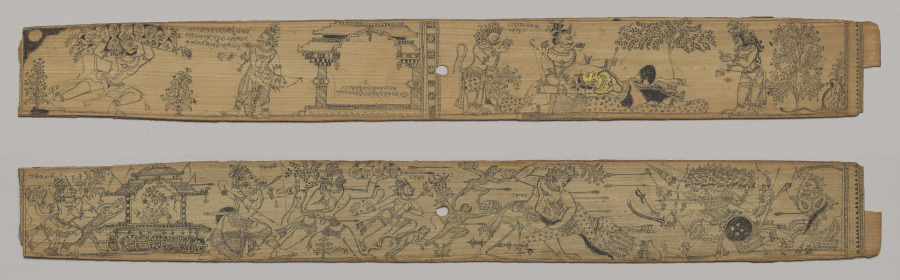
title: Leaf from a Romance of Chandrabhanu and Lavanyavati of Upendra Bhanja (Indian, died 1740)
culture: Eastern India, Odisha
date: late 1700s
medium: Charcoal on palm leaf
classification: Painting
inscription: on both recto and verso in Oriya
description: This leaf from an 18th-century romance manuscript comes from a section of the book that retells the epic battle between the demon Ravana and the god-hero Rama. The 10-headed multiarmed demon Ravana is the second figure from the right. Rama’s army of monkeys and bears, wielding tree branches and clods of earth, fill the remainder of the leaf. The images were created using a stylus that incised into the palm leaf; charcoal was then rubbed over the leaf and wiped off, leaving only the incised areas in black.